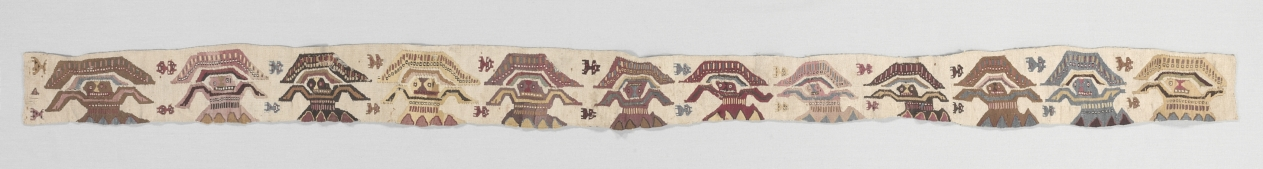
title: Lower Border of a Garment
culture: Central Andes, North Coast, Chimú or Lambayeque (Sican) People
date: 1000–1470s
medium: tapestry; wool and cotton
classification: Textile